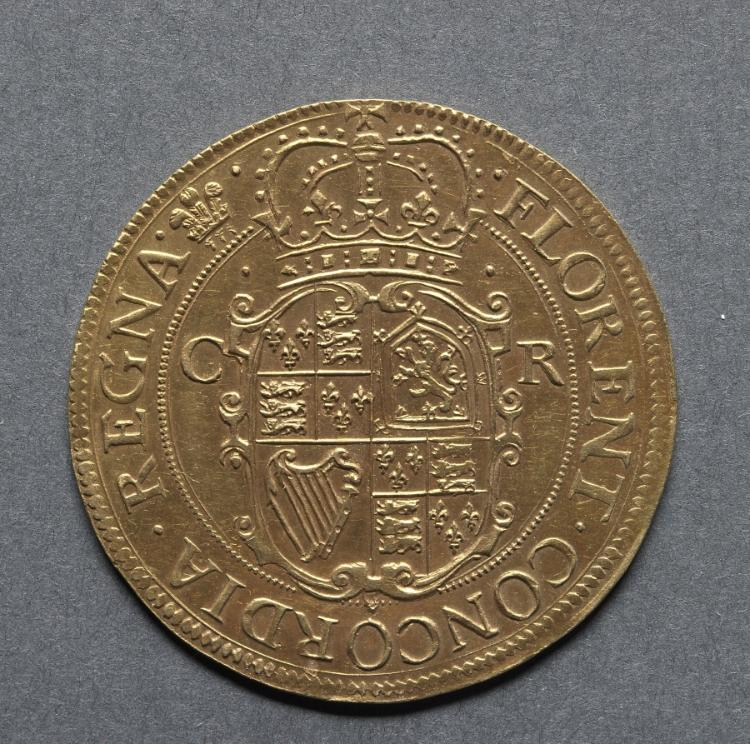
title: Unite: Crowned Shield (reverse)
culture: England, Charles I, 1625-1649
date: 1630–1631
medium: gold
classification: Coins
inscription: FLORENT CONCORDIA REGNA, CR